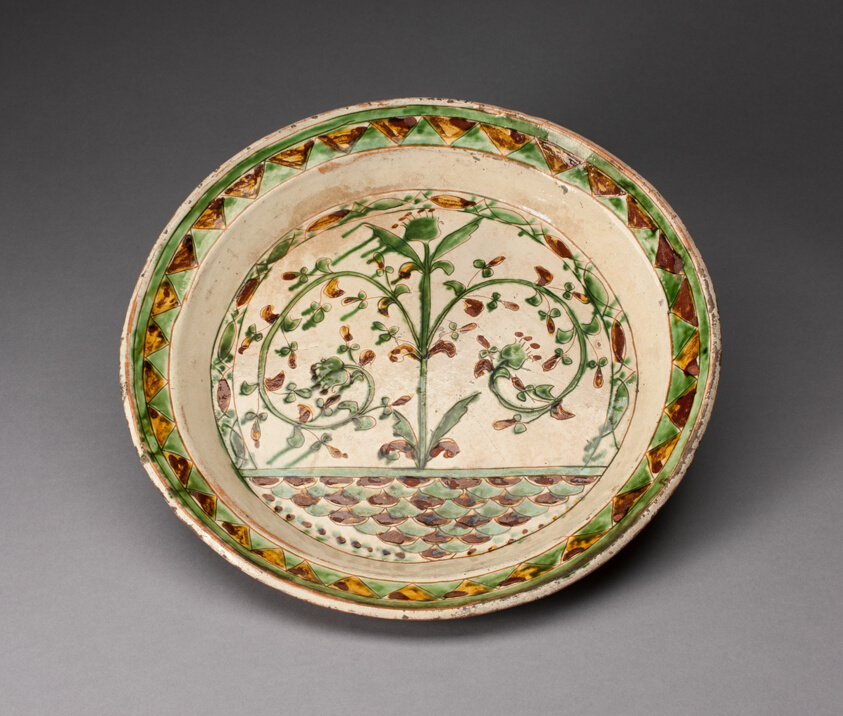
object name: Decorative Arts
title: Shaving Dish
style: talavera, Arts of the Americas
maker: Talavera poblana; Puebla, Mexico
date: 1800–50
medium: Tin-glazed earthenware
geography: Puebla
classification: earthenware; american decorative arts; european decorative arts; ceramics; decorative arts; art of the americas